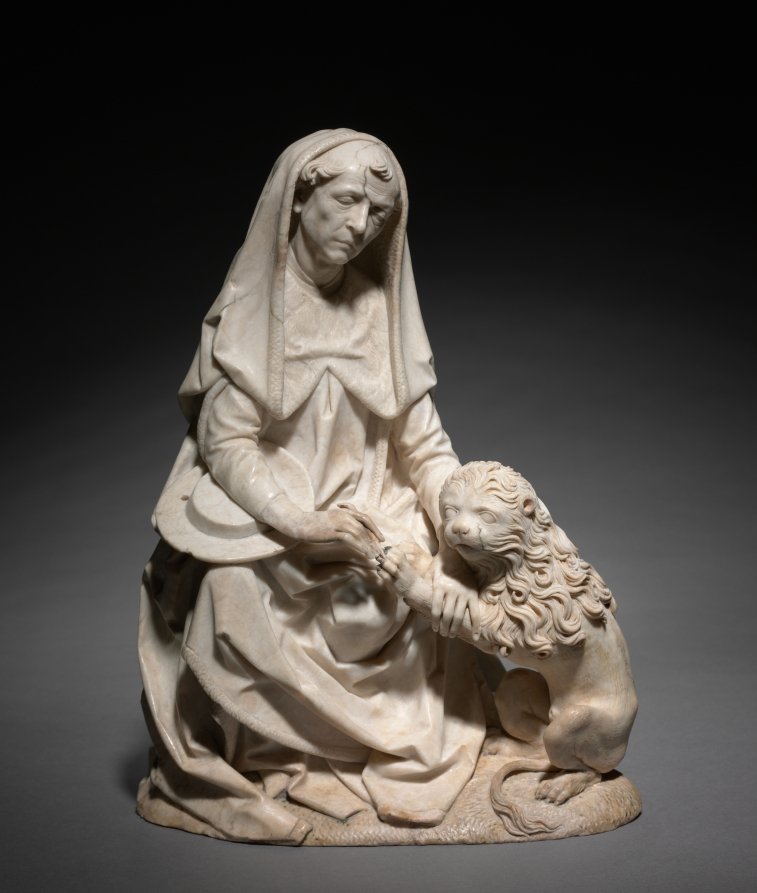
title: Saint Jerome and the Lion (From the former Church of St. Peter in Erfurt)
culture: Germany, Würzburg, late 15th Century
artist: Tilman Riemenschneider (German, active Würzburg, c. 1460–1531)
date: c. 1495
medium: alabaster, traces of polychromy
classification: Sculpture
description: According to legend, Saint Jerome (347–420 bce) lived in the desert, where he removed a thorn from an injured lion. Jerome is venerated in the Catholic Church as a Church Father, an important early author of Christianity. Here, he wears cardinal’s clothing from around 1500. Tilman Riemenschneider focused on Jerome’s relationship with the lion, creating empathy for the wounded animal. The delicacy of the depiction, which may have been partially painted to add highlights, is typical of alabaster, as is its fine polishing. The cord of the cardinal’s hat, missing today, may have been supplemented from another material.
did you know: In the story Saint Jerome encounters a fearsome lion, here depicted as diminutive, gentle, and submissive.